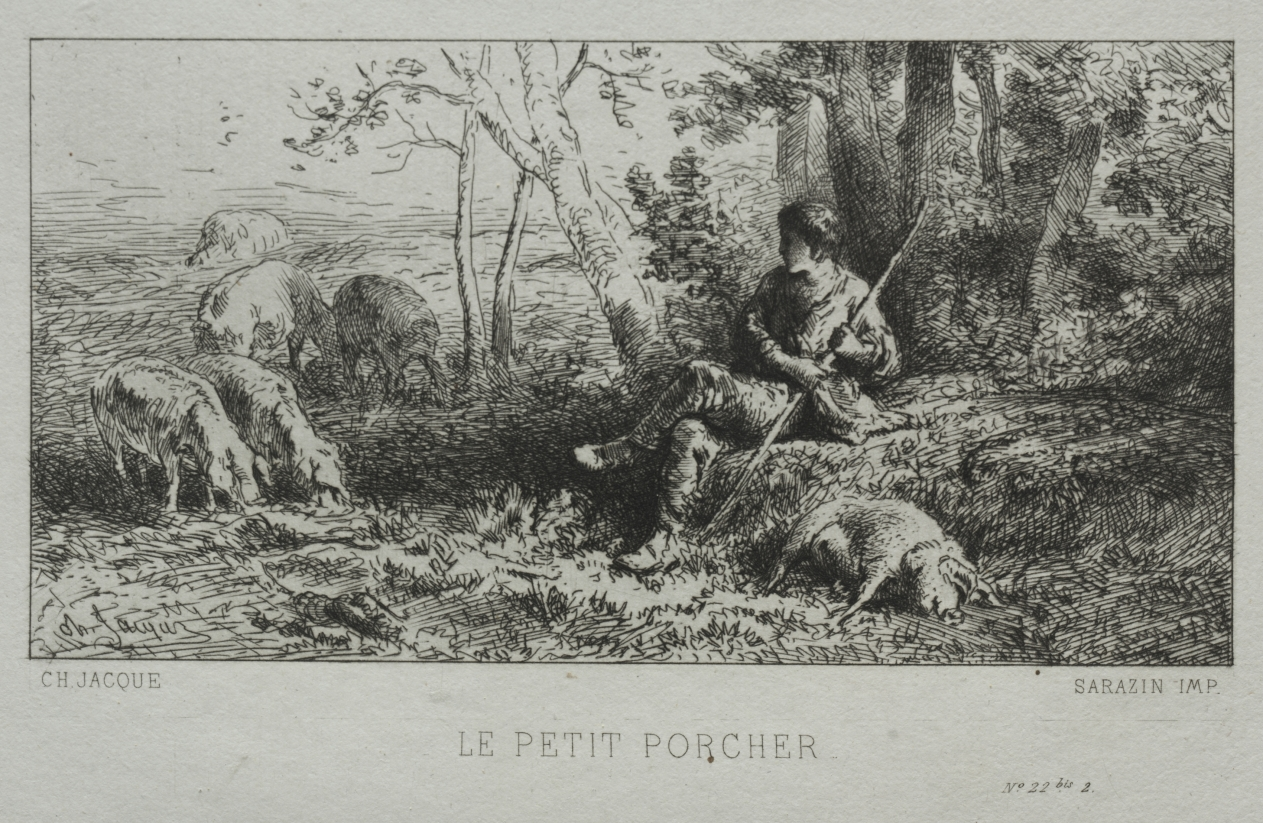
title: The Little Pig Herd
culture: France, 19th century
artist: Charles-Émile Jacque (French, 1813–1894)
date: 1864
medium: etching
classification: Print